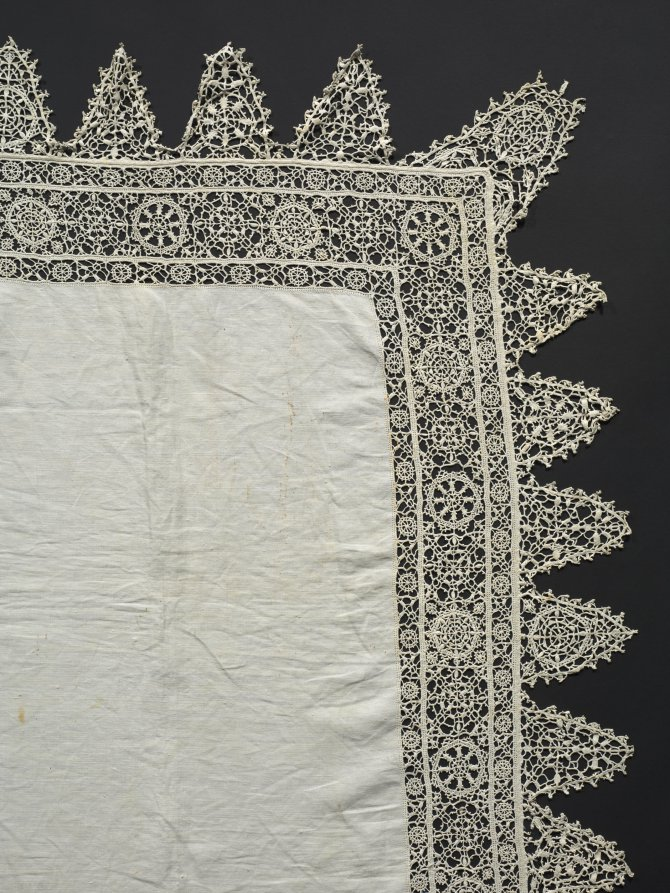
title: Cloth with Lace Edging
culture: Italy, Genoa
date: 1600s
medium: linen: needlepoint lace (reticella) top of linen sheet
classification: Lace